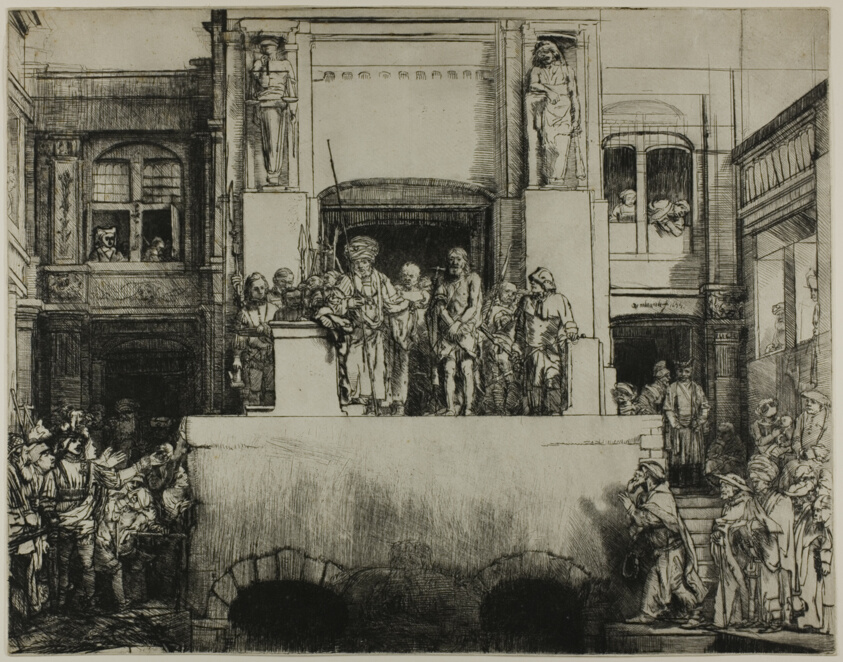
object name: Print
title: Christ Presented to the People: Oblong Plate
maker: Rembrandt van Rijn (Dutch, 1606-1669)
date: 1655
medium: Drypoint on white laid paper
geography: Holland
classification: drypoint; print; prints and drawing; paper